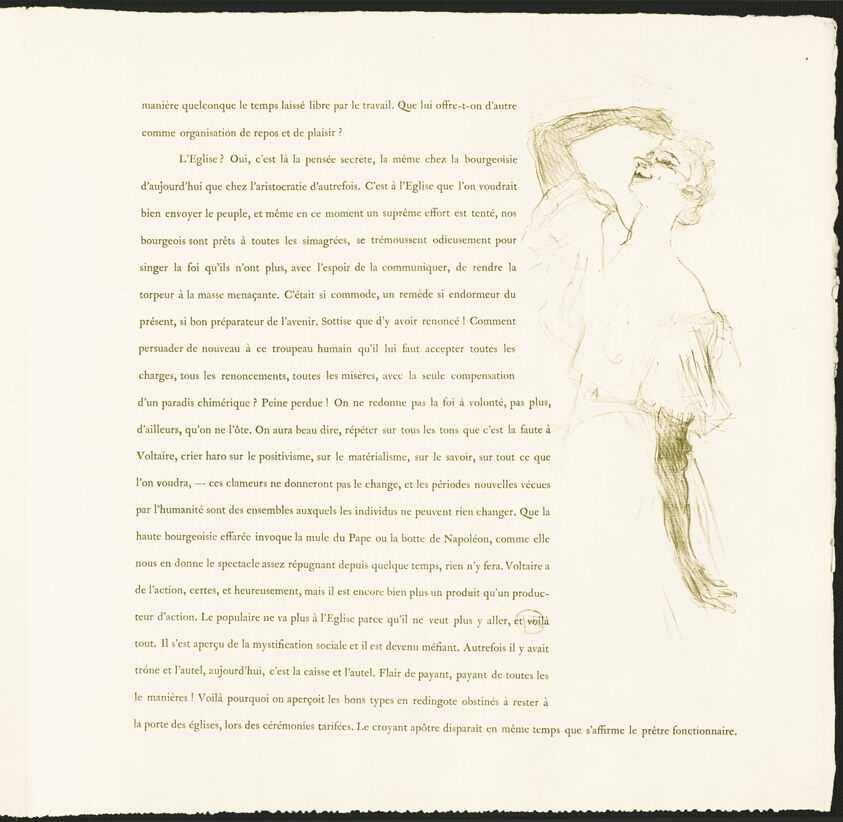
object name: Print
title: Yvette Guilbert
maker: Henri de Toulouse-Lautrec (French, 1864-1901)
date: 1894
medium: Lithograph with letterpress, on ivory laid paper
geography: France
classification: lithograph; print; prints and drawing